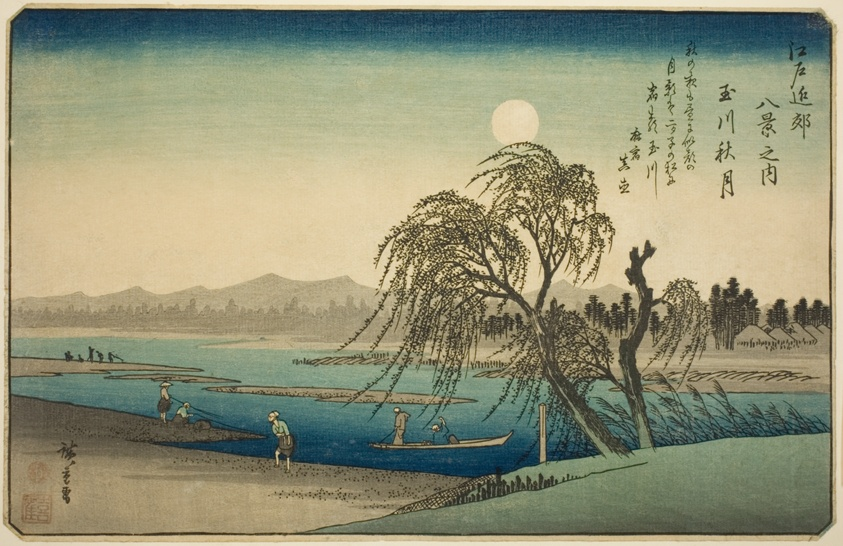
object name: Print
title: Autumn Moon over Tama River (Tamagawa no shugetsu), from the series "Eight Views in the Environs of Edo (Edo kinko hakkei no uchi)"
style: Japanese (culture or style)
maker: Utagawa Hiroshige 歌川 広重; Japanese, 1797-1858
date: c. 1837/38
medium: Color woodblock print; oban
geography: Japan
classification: woodblock print; print; asian art